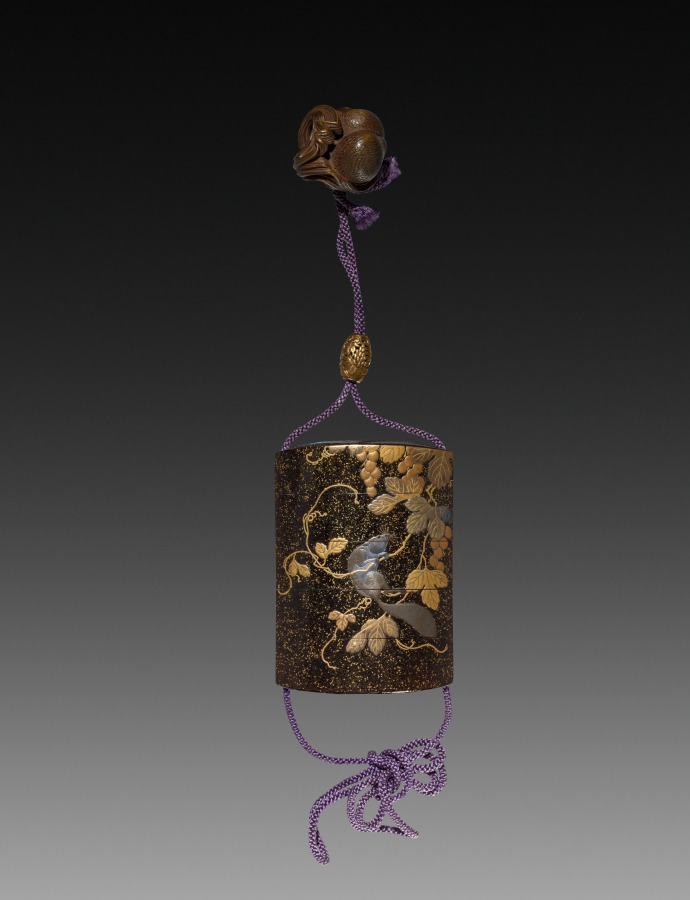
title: Inro (Case) with Squirrels in Grapevines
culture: Japan, Edo period (1615–1868)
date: 1700–1868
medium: Lacquer on wood with sprinkled gold powder design (maki-e)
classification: Lacquer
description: With multiple small compartments joined with a woven silk cord, inro are small cases that can be worn on one’s obi, the sash fastening a kimono. This one has a metal ojime, or small cinch, with a pierced floral design and a wood netsuke (toggle) carved with an autumnal design of quails in millet. The netsuke can be used both to pull the inro out and to help keep it in the obi. Squirrels in grapevines is a popular autumn motif.